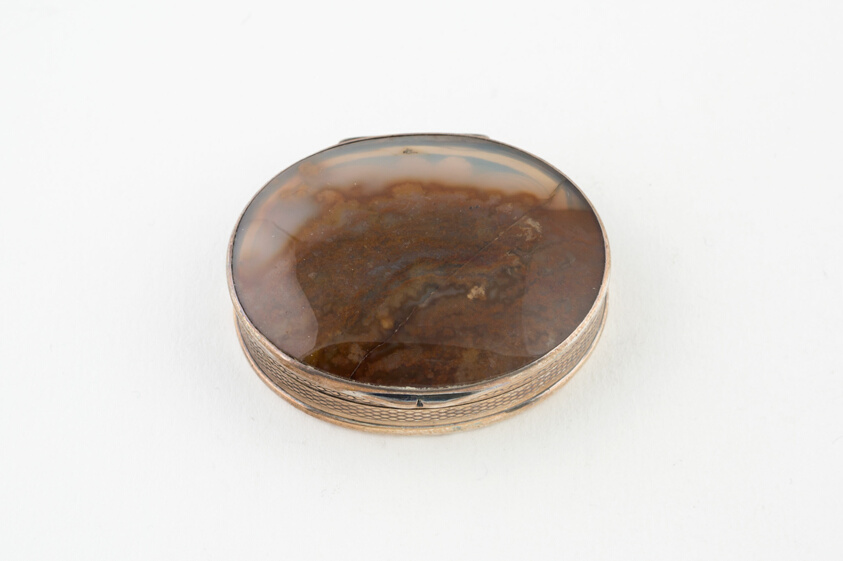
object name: Metalwork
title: Vinaigrette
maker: Marked CP WS; London, England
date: 1841/42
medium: Silver, silver gilt, and agate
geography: London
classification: vinaigrette (container for health care); container for personal use; box; european decorative arts; metalwork; silver; decorative object/ornament